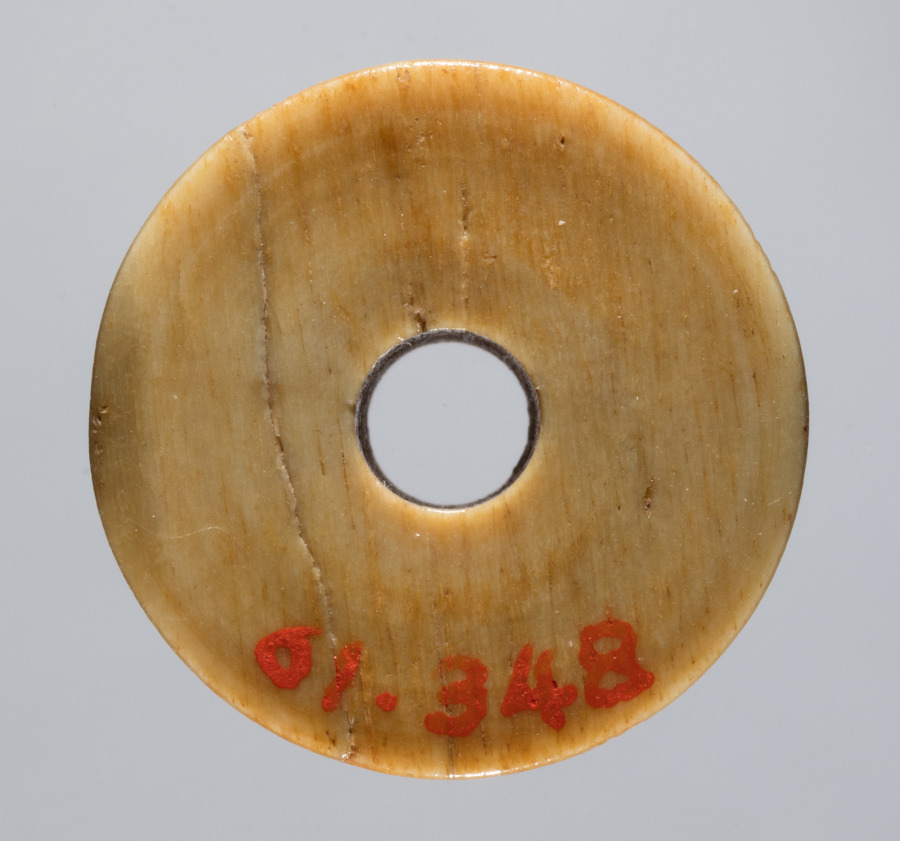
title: Spindle Whorl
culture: Iran, early Islamic period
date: 700s - 900s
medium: bone, incised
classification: Spindle Whorl